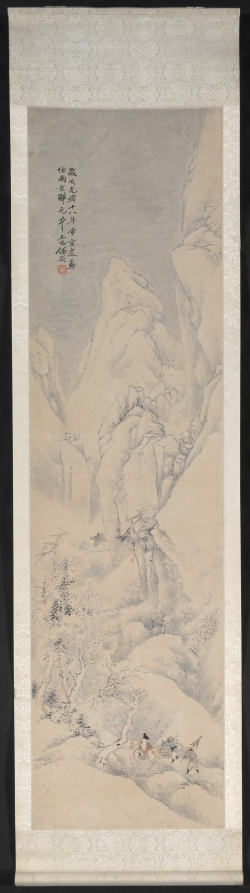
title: Landscape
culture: China, Qing dynasty (1644-1911)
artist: Ren Yu (Chinese, 1853–1901)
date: 1892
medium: Hanging scroll; color on paper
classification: Painting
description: This seasonal landscape is from a set of four hanging scrolls by Ren Yu. He was the youngest, most eccentric, and least prolific of the Four Rens, a family of prominent painters in Shanghai during the late Qing dynasty (1644–1911). Perhaps due to his opium habit and subsequent financial difficulties, Ren Yu tended to be lackadaisical in his work. The few remaining high-quality paintings hint at his artistic potential lost to opium. Though Ren’s premature death left his artistic promise unfulfilled, his paintings were acquired and donated to the museum by Charles Lang Freer (1854–1919), a wealthy businessman and art collector from Detroit. As Freer had hoped, this donation of Ren Yu paintings inspired the young Cleveland Museum of Art to continue to expand its own Chinese painting collection.